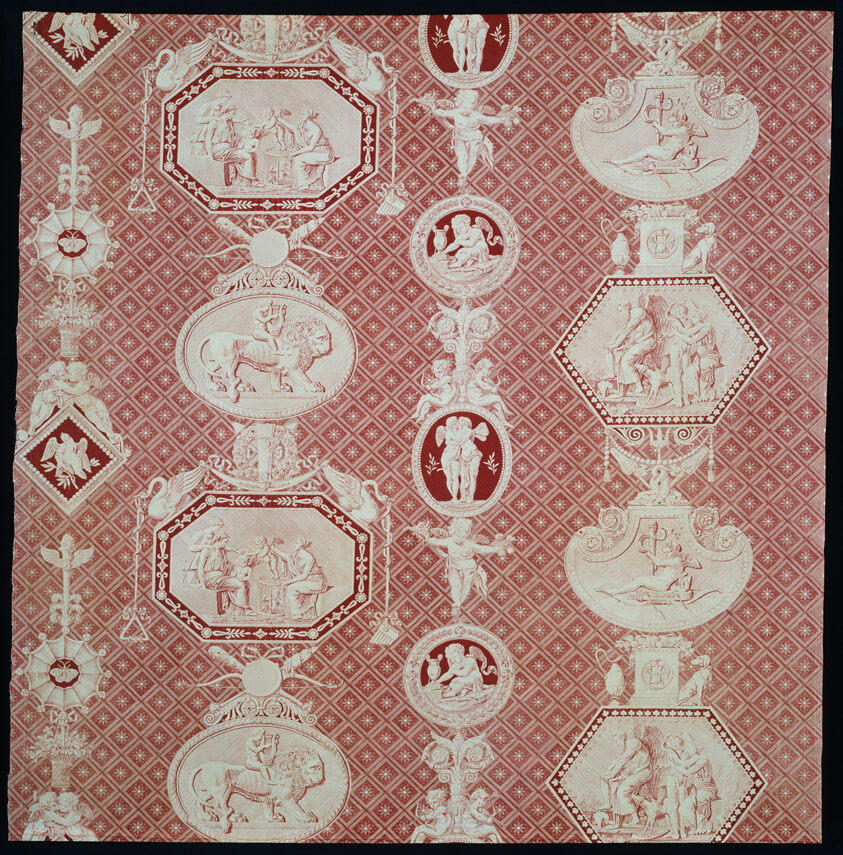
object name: Textile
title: La Marchande d'Amour (The Merchant of Love) (Furnishing Fabric)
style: jouy-en-Josas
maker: Designed by Louis-Hippolyte LeBas (French, 1782–1867) after Jacques Firmin Beauvarlet (French, 1731-1797); Manufactured by Christophe-Philippe Oberkampf (naturalized French, 1738-1815), Oberkampf Manufactory (French, 1760-1843); Jouy-en-Josas, France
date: 1815/17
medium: Cotton, plain weave; engraved roller printed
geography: Jouy-en-Josas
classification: textile; weaving - printed; printed textile; furnishing textile